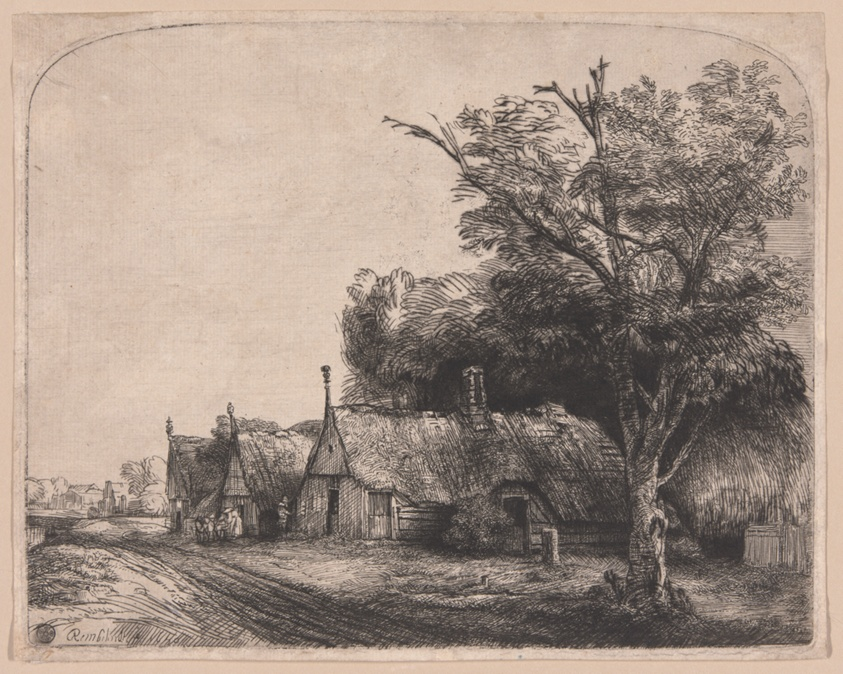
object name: Print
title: Landscape with Three Gabled Cottages Beside a Road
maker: Rembrandt van Rijn (Dutch, 1606-1669)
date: 1650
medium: Etching and drypoint in black on cream laid paper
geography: Holland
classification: etching; print; prints and drawing; paper; drypoint